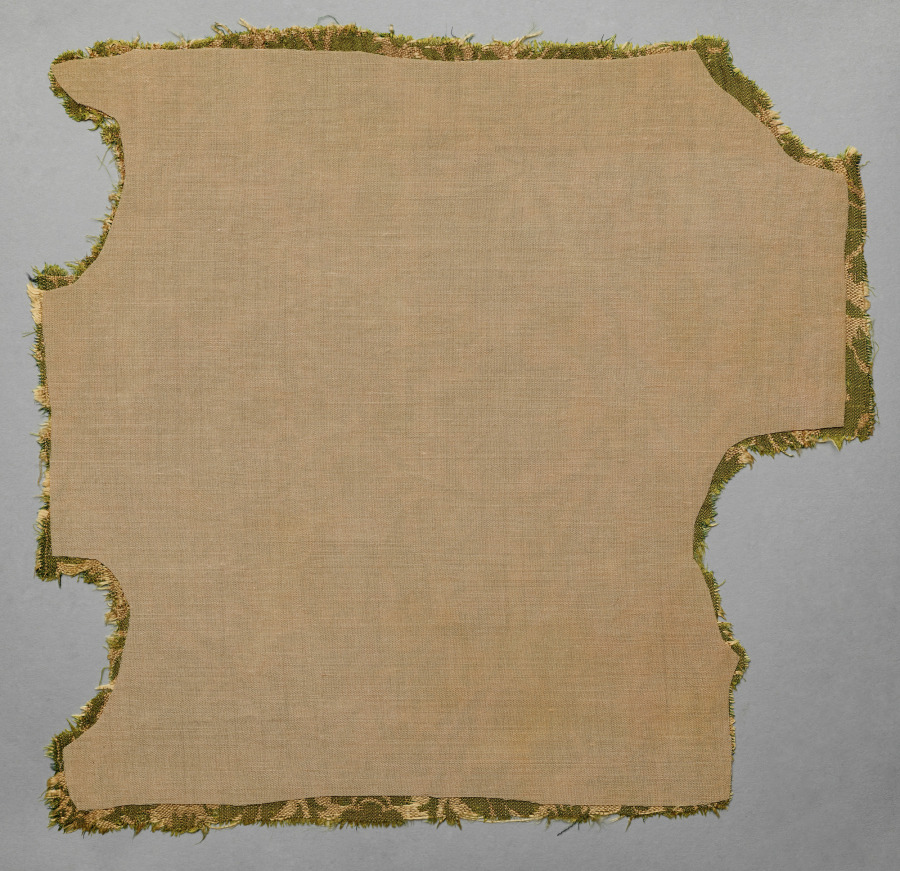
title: Silk fragment with scrolling vines, grape leaves, grapes, and birds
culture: Italy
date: 1325–50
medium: Silk: lampas weave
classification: Textile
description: This silk fragment displays a revolutionary new fashion in Italian textile design, influenced by the exotic patterns in silks imported from China, Byzantium, and Islamic countries of the Middle East. Beginning in the 1320s, instead of the static arrangement of motifs stacked one above the other, Italian designers staggered the motifs, creating asymmetry and movement. Even this fragment suggests motion through the arrangement of motifs in a curved lattice layout. However, the actual motifs—the grape leaves and bunches of grapes—remain typically Italian.